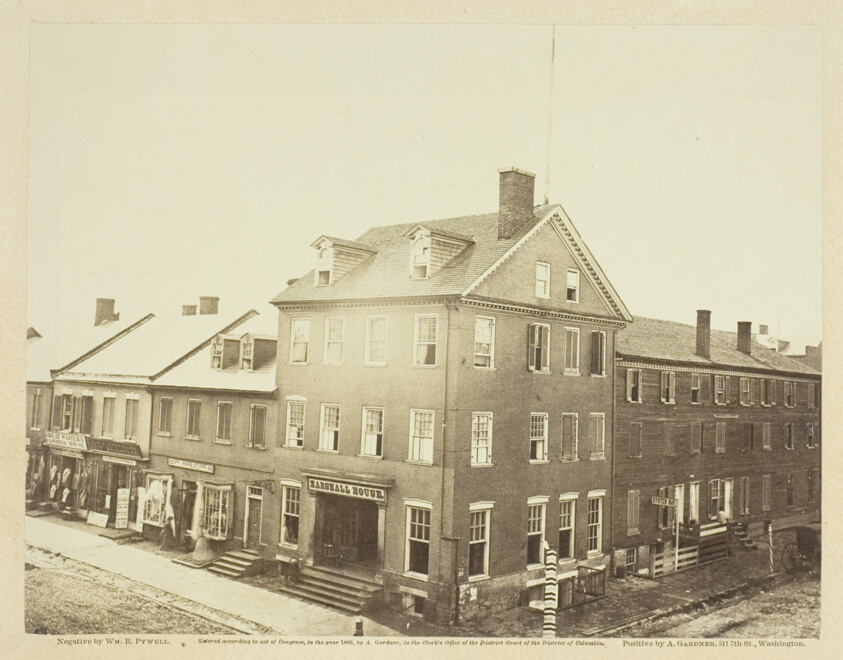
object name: Photograph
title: Marshall House, Alexandria, Virginia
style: 19th century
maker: William R. Pywell (American, 19th century)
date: August 1862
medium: Albumen print, pl. 1 from the album "Gardner's Photographic Sketch Book of the War, vol. 1" (1866)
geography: United States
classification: albumen silver print; photographic process; photography; photograph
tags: Collected by Hugh Edwards, Gardner's Photographic Sketch Book